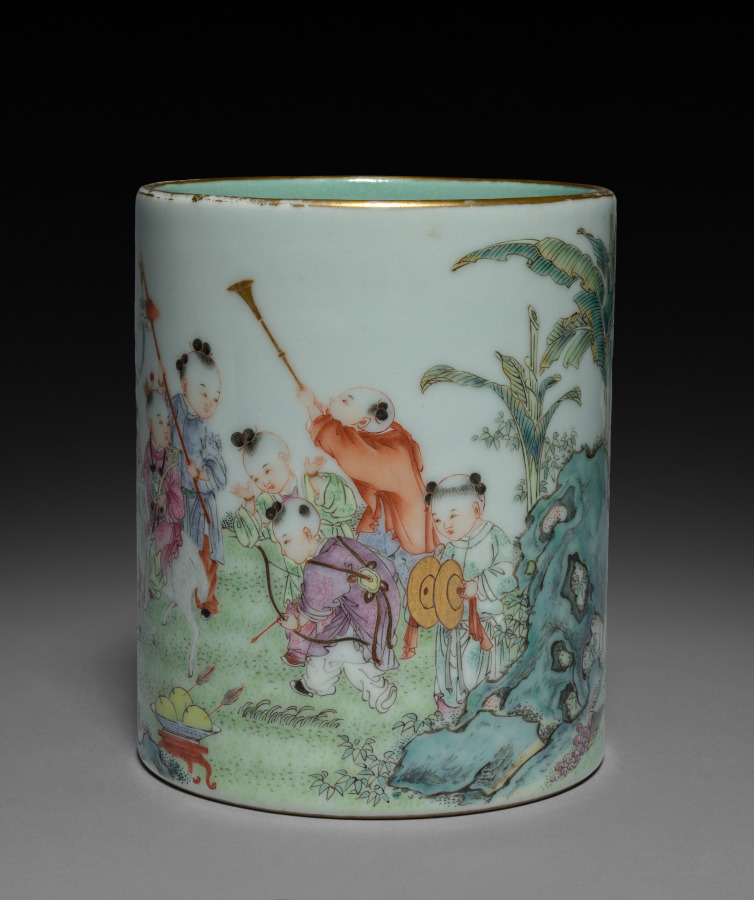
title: Cylindrical Brushholder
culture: China, Qing dynasty (1644–1911), Qianlong reign (1736–95)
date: 1736–95 or later, mid-1800s?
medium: porcelain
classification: Ceramic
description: The brush holder shows children celebrating seasonal festivals, pursuing games, and masquerading as adults with attributes that suggest their future careers in the military or civil service. Three boys play in the shadow of a garden rock with cricket cages; others parade a boy on a goat who wears the headgear of a scholar who passed first in the state examinations. Left to the goat kneels a boy who is about to ignite fire crackers lined up on a stone, a custom to celebrate the New Year. Moreover, the combinations of motifs form puns that express auspicious wishes.